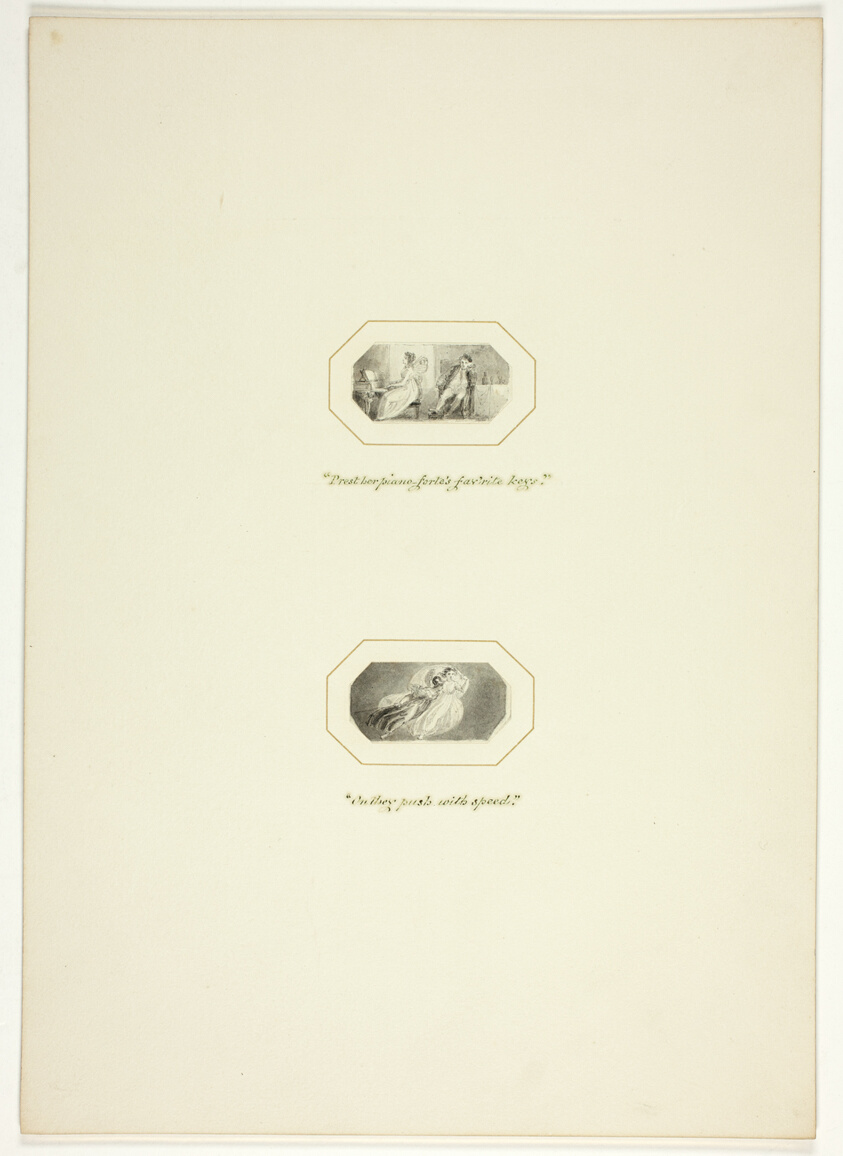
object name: Drawing and Watercolor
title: Study for a plate from The Triumphs of Temper, in the 1796 Royal Engagements Pocket Book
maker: Thomas Stothard (English, 1755-1834)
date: c. 1795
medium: Ink wash on paper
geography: England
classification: ink or chalk wash; drawings (visual works); prints and drawing